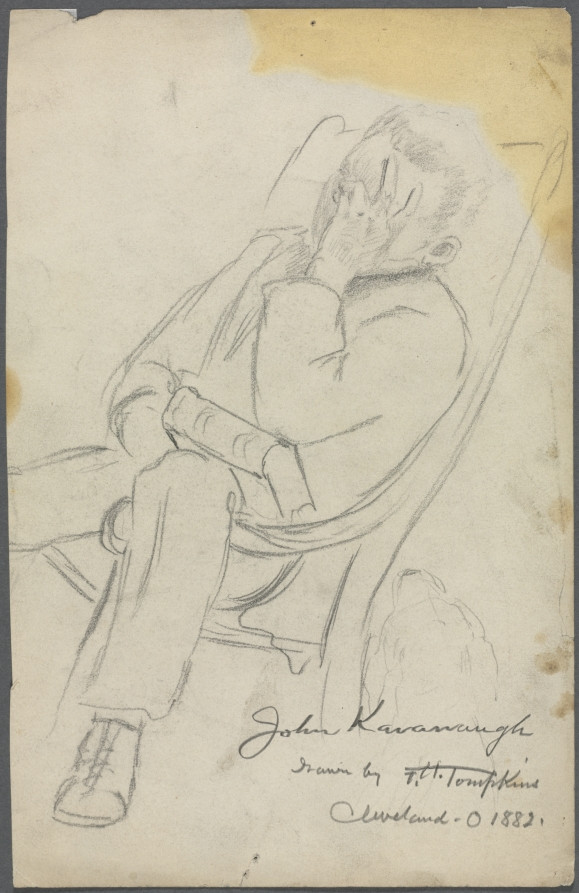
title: Sketch of John Kavanaugh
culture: America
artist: Frank H. Tompkins (American, 1847–1922)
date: 1882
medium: pencil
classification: Drawing